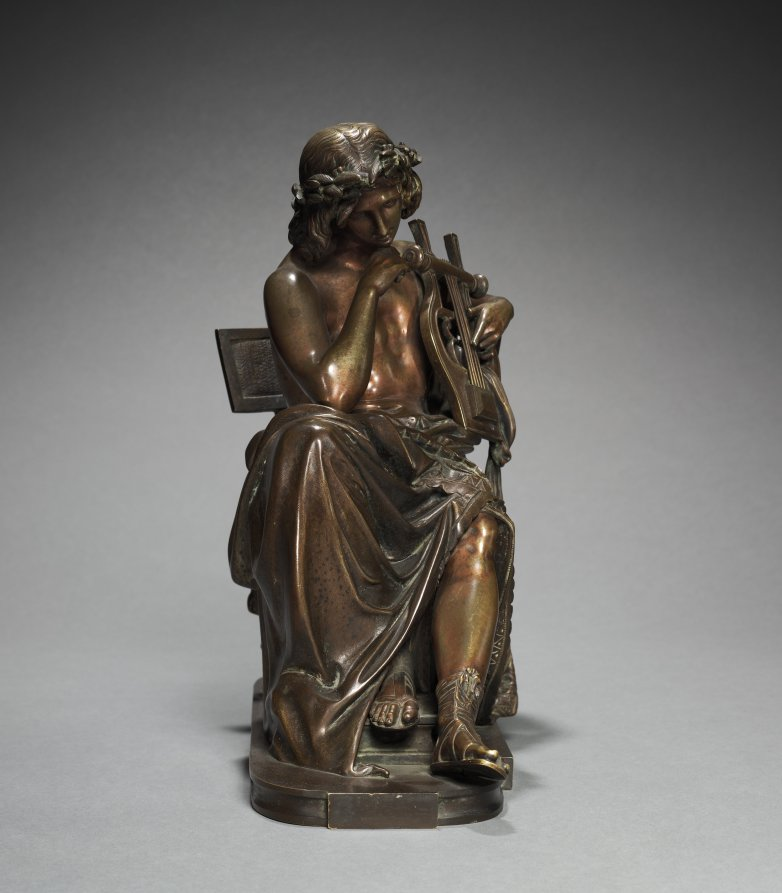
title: Orpheus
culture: France, 19th century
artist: Albert-Ernest Carrier-Belleuse (French, 1824–1887)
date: early 1860s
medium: bronze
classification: Sculpture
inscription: Signed: "A. Carrier"; inscribed: "Boyer"